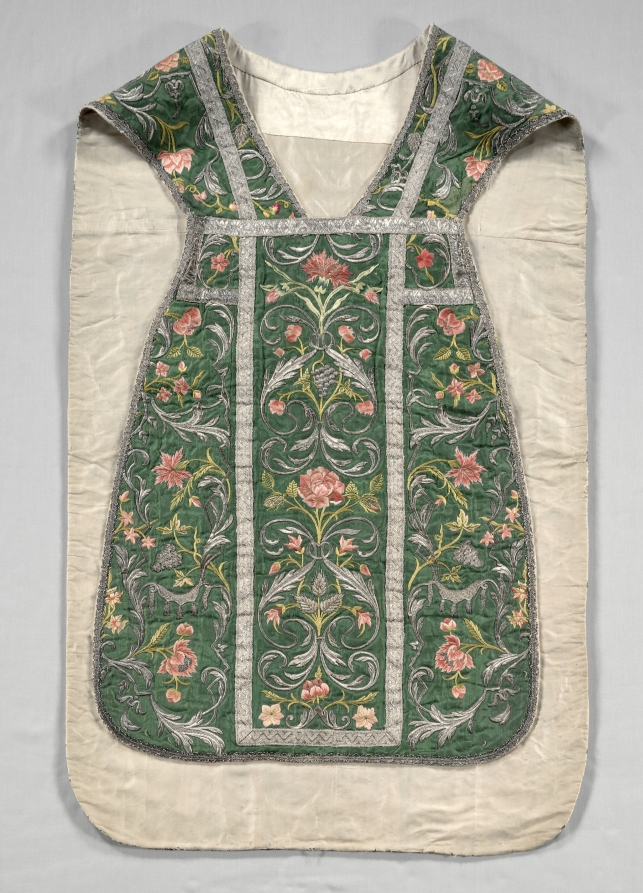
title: Chasuble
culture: Italy, 18th century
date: 1700s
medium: Silk and metallic threads: embroidery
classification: Embroidery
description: Sheaves of wheat and bunches of grapes, symbols of the bread and wine of the Mass, are embroidered with silver-metal thread amid scrolling leaves on the green silk-damask ground of this chasuble. Liturgical colors—white, red, green, and black, purple, or blue—mandated by Pope Innocent III in the late 1100s were widely ignored by the 1700s, replaced primarily by a lavish use of gold, silver, and pastel silk thread embroidered on white silk fabrics. Long matching stoles were worn under chasubles in styles that identified deacons, priests, and bishops.